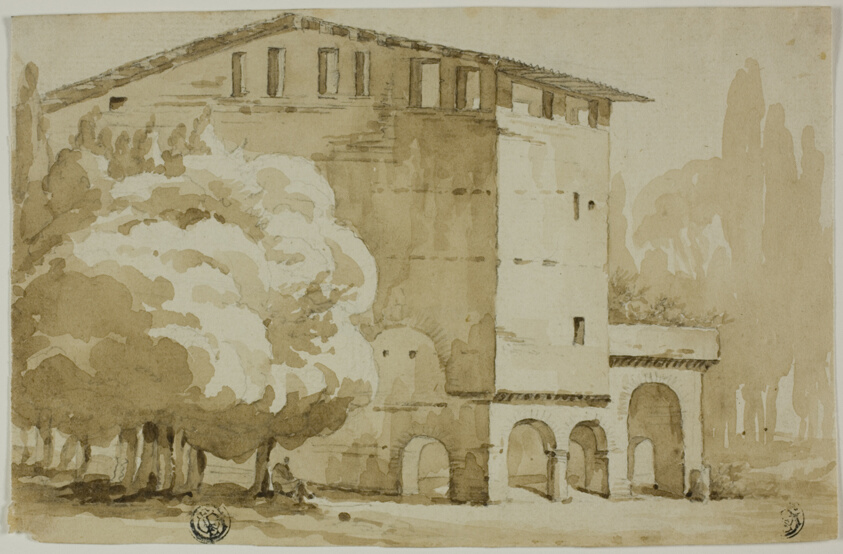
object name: Drawing and Watercolor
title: Medieval Granary in the Roman Campagna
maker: Unknown Artist; Italian, 1700-1799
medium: Brush and brown wash, with graphite, on ivory laid paper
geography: Italy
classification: ink or chalk wash; drawings (visual works); prints and drawing